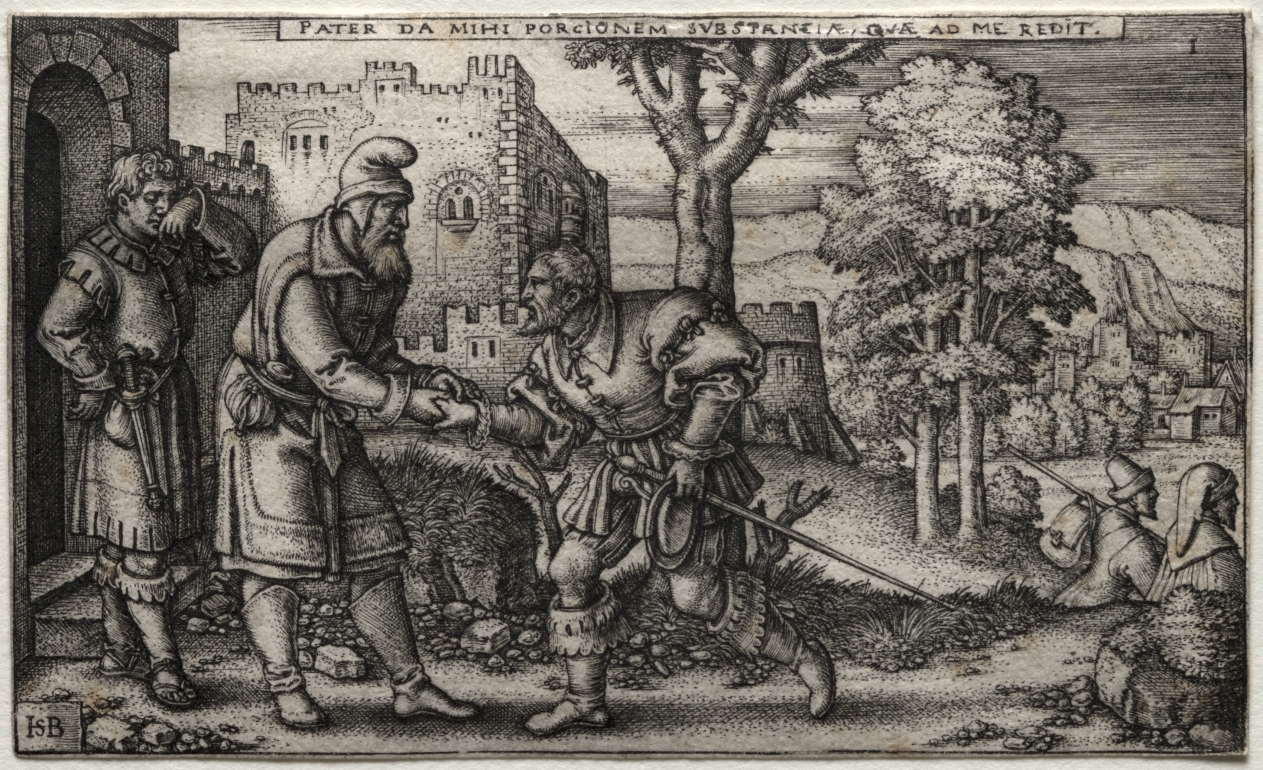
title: The Prodigal Son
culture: Germany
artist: Hans Sebald Beham (German, 1500–1550)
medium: engraving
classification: Print